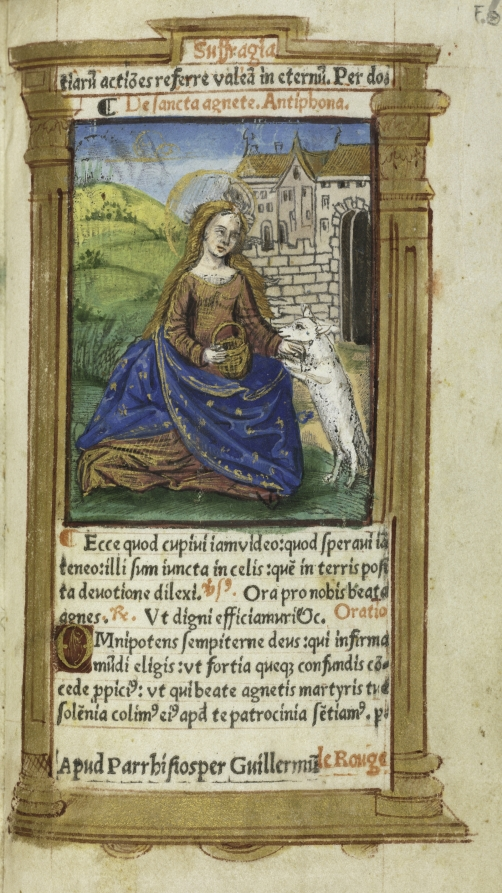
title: Printed Book of Hours (Use of Rome): fol. 112r, St. Agnes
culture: France, Paris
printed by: Guillaume Le Rouge (French, Paris, active 1493–1517)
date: 1510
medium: 112 Printed folios on parchment, bound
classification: Bound Volume